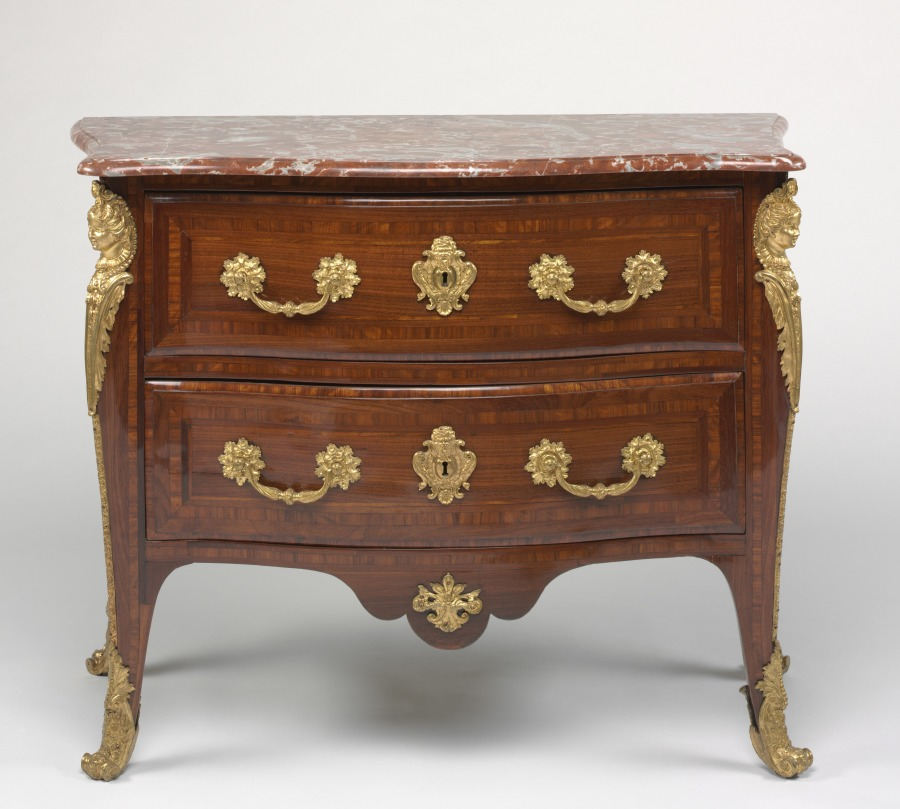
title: Chest of Drawers (Commode)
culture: France, Paris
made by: attributed to Etienne Doirat (French, c. 1670–1732)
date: c. 1725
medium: kingwood with gilt-metal mounts, marble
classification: Furniture and woodwork